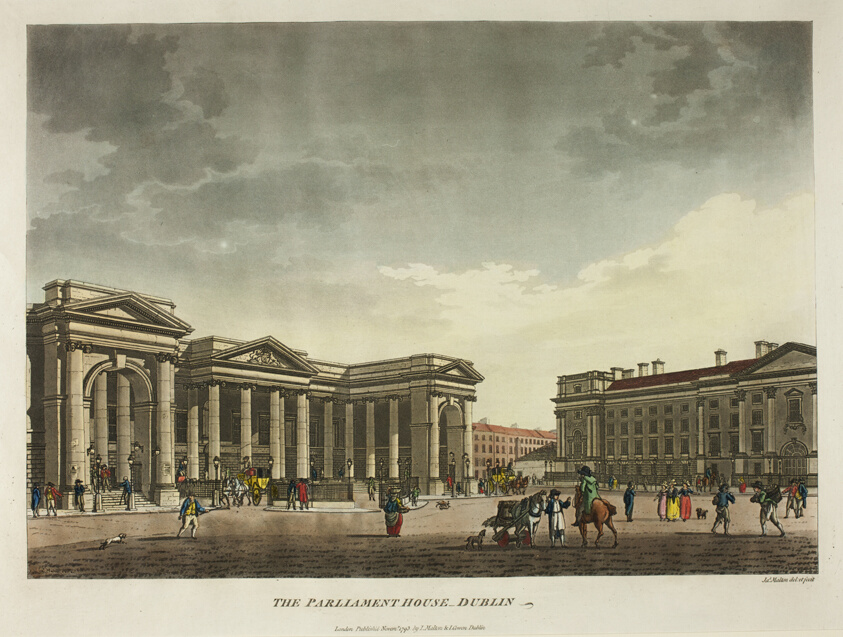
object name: Print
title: The Parliament House - Dublin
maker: James Malton (English, 1761-1803)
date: published November 1793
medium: Hand-colored aquatint in black on ivory wove paper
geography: England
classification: aquatint; print; prints and drawing